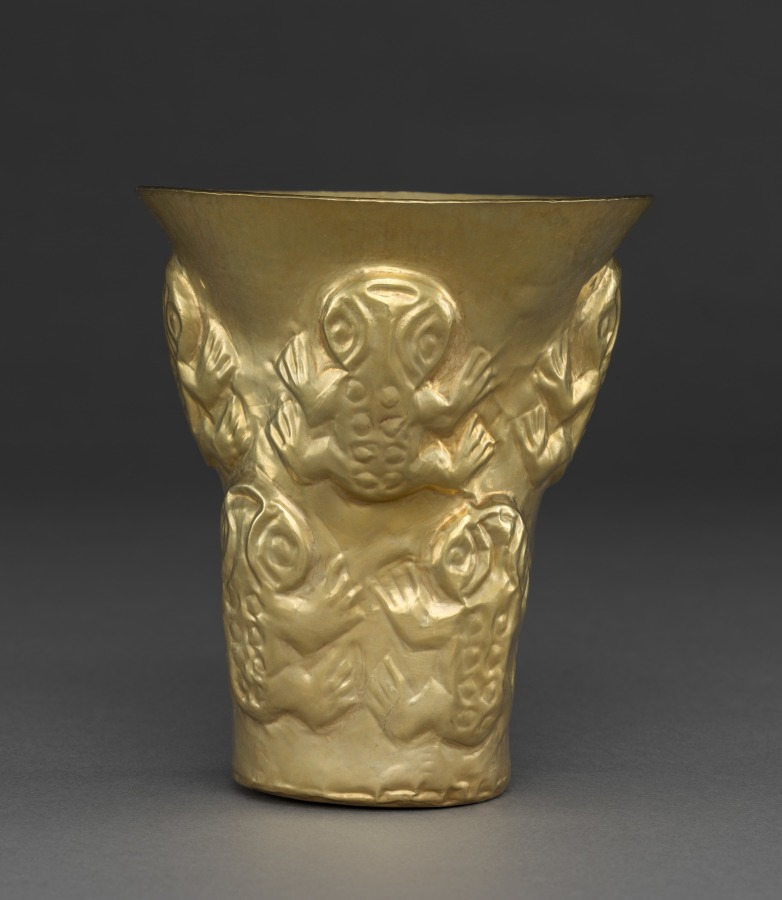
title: Beaker with Frogs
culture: Central Andes (Peru), Lambayeque (Sicán) people, 10th century-12th century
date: 900–1100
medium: gold, hammered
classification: Metalwork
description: This beaker was created by an artist of the Lambayeque culture of Peru's north coast. High-relief frogs grace the surface, which has a dramatically flaring rim as well as a silvery color, the result of silver in the alloy. If such beakers were used in life—that is, not created exclusively for the lavish tombs in which they have been found in quantities—they may have figured in feasting events that were central to late pre-Hispanic political, social, and religious life.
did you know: This beaker was probably formed using a single sheet of metal over a wooden form.